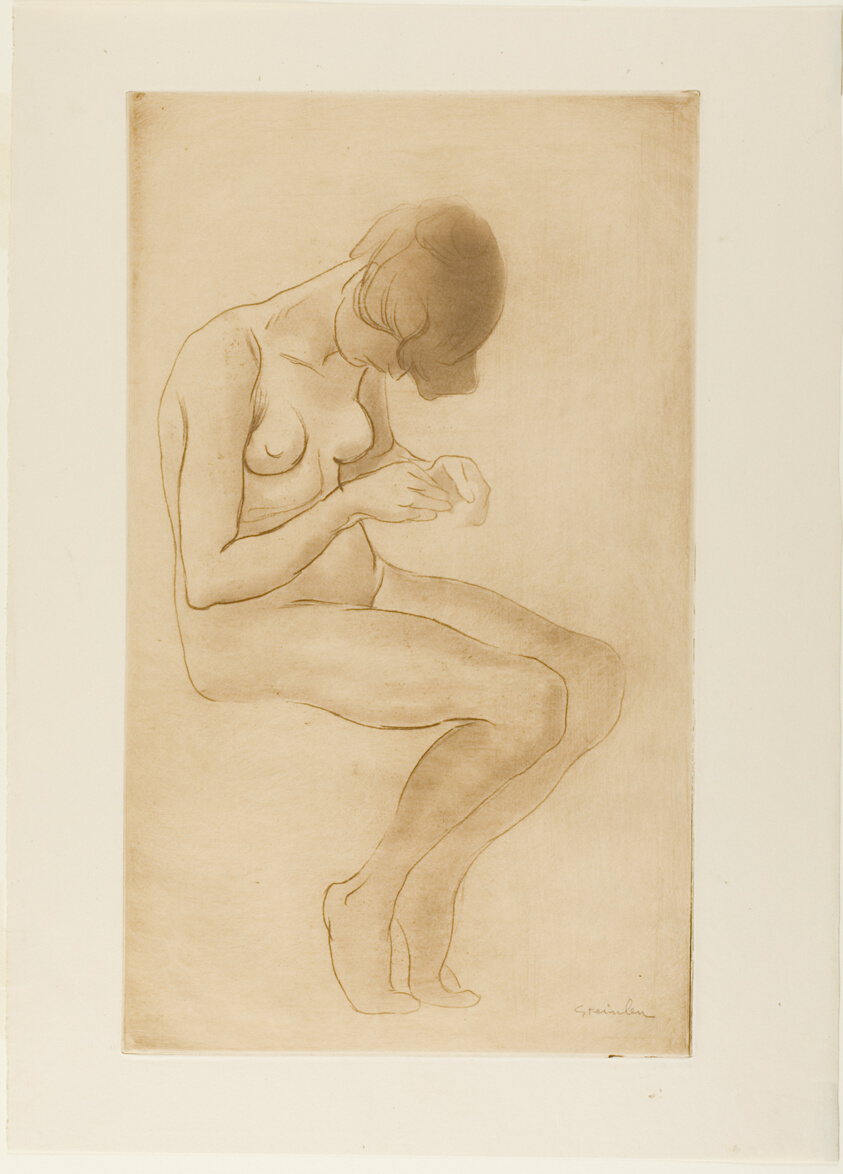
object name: Print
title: Woman Fixing Her Nails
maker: Théophile-Alexandre Steinlen; French, born Switzerland, 1859-1923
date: June 1902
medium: Aquatint and soft ground etching from a zinc plate in brown (bistre) on ivory wove paper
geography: France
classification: aquatint; print; prints and drawing